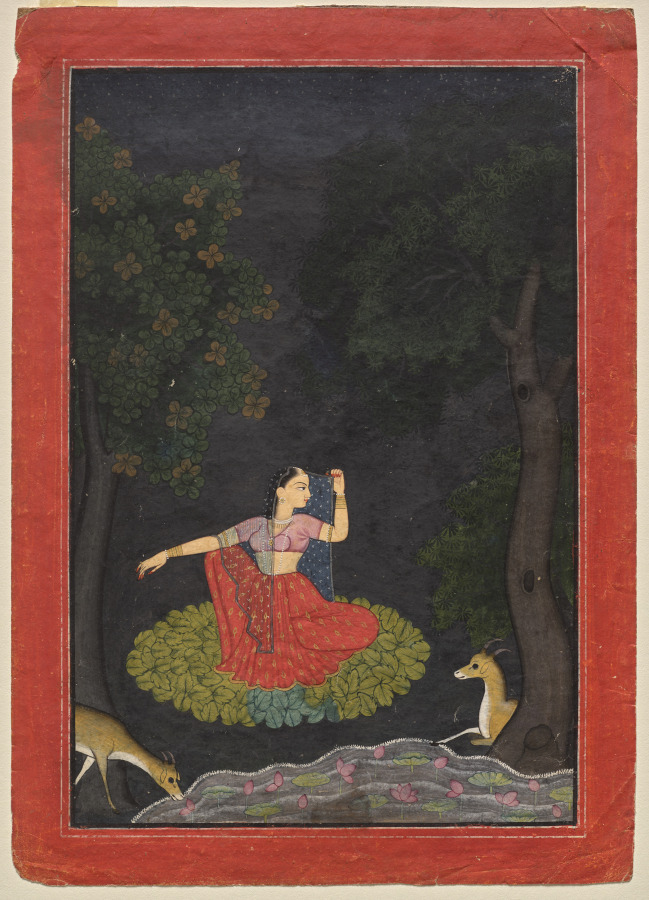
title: A heroine waiting for her lover: Vasakasajja Nayika, from the "Nurpur" Rasikapriya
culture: Northern India, Pahari kingdoms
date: c. 1750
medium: Gum tempera and gold on paper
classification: Painting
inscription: caṃdana vepata vepa komala āṃmala kaṃma lada lalavi lalata latā lapadī lavaṃga ki. kesodāsa tame dara dīpa ka sekhā sī dura dura doura vāṭa vāsa nīla duta āṃga āṃgakī. poṃna paṃni peṃci pasu vasa savada hota ne leke teṃ cāhe cāṃpa saṃga kī. naṃdalāla āgaṃma balokeṃ balakuṃja lagata tahi kānapīṃ tara pataṃga kī.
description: Vasakasajja has been described as Nayika who arranges the bed for making love. She is seated on a bed of leaves by a pond, anxiously waiting for her lover. The painter has faithfully followed the poet’s description of the scene and depicted the fair-complexioned Nayika radiating against the otherwise dark surrounding, illuminating the tryst.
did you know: The deer are depicted in a pair to highlight the Nayika’s separation.